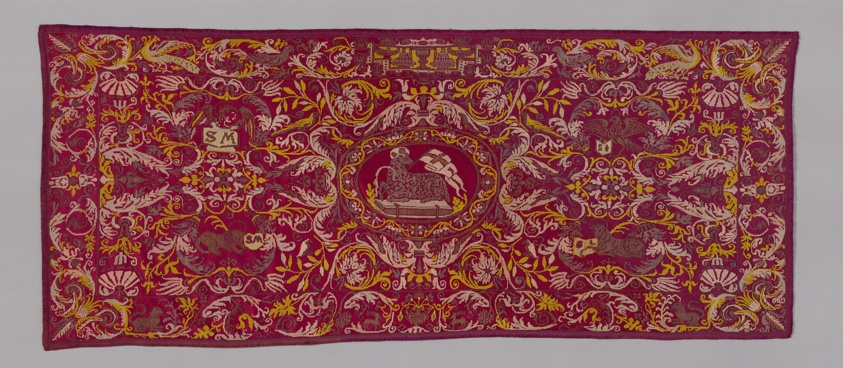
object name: Textile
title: Antependium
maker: Italy or Poland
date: 19th century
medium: Silk, knotted square netting; embroidered with silk and gilt-metal-strip-wrapped silk in cloth and darning stitches; edged with silk, warp-faced plain weave extended ground weft uncut fringe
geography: Italy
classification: textile; weaving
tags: religious scenes